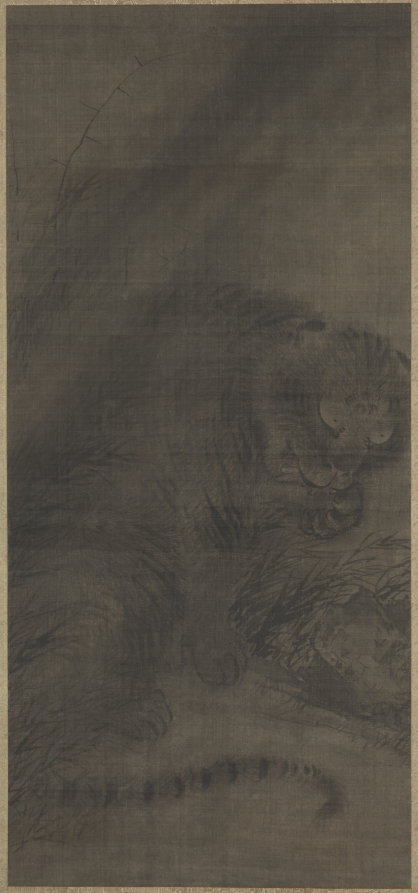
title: Tiger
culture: China, Southern Song dynasty (1127-1279)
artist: Fachang Muqi (Chinese, 1220–1280)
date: c. 1250–79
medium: Hanging scroll; ink and slight color on silk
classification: Painting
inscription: 道有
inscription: 雜華室印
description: The dragon and tiger are tied to the philosophical concept of yin and yang, which describes opposite but complementary forces. The dragon occupies a tiered background of waves and mist. Its luminous head emerges from the darker passages, and its narrow twisting body is serpent-like. By contrast, the close-up view of the tiger emphasizes its bulk. The tiger bends its head to lick its paw while its tail curls in the foreground. In their original Chan Buddhist context, this pair of scrolls likely flanked a central image, like the Bodhisattva Guanyin. The silk has darkened over the centuries, and the slight reddish shading in the tiger’s tongue and nose has faded.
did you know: Fachang Muqi's ink paintings, like this pair, were highly appreciated and collected in Japan.